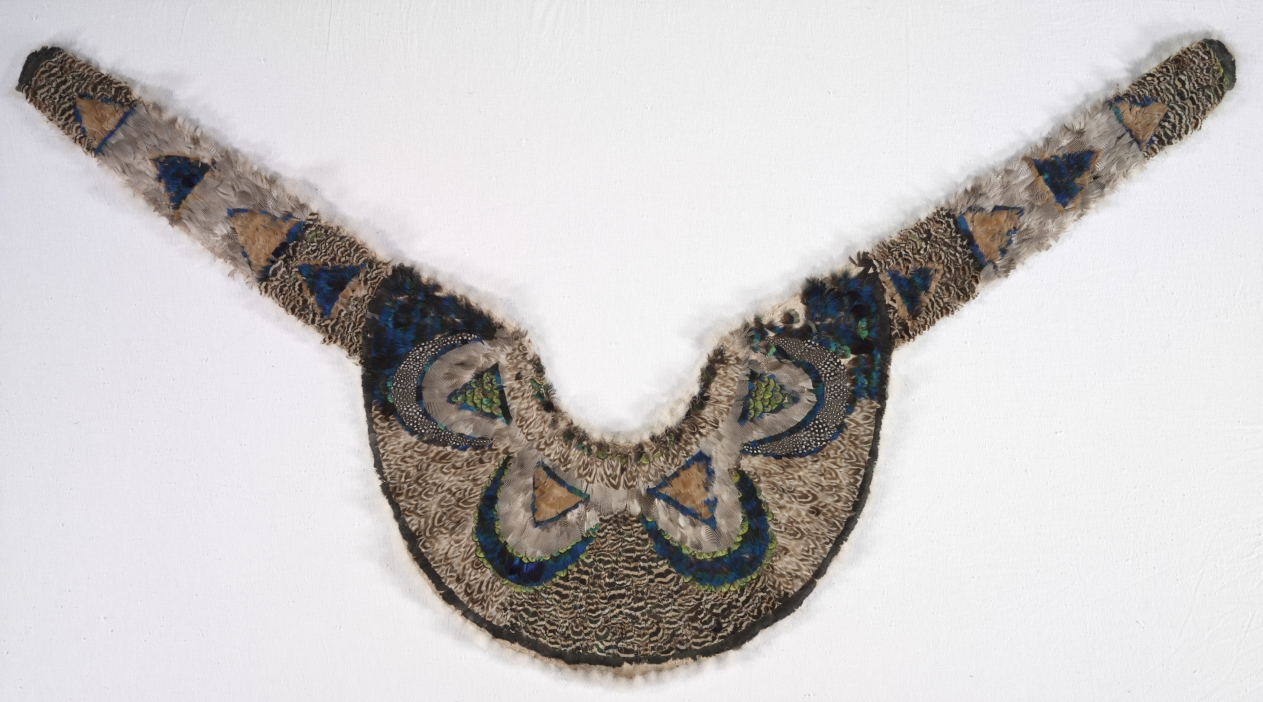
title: Pelerine (Collar or Cape)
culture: Northeastern Woodlands, Great Lakes/St. Lawrence River Region or Europe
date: c. 1830–1860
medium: Cotton, peacock feathers, guinea fowl feathers?, Gadwalls duck feathers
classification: Textile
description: Experts argue about collars of this type: Did a Great Lakes native artist make it, using as a model an English lady’s pelerine and exotic feathers obtained through trade? Or was the collar created by a European feather worker, perhaps after seeing the spectacular feather capes of native Hawaiian royals who visited England in 1824? There are arguments for both views—and for further research.